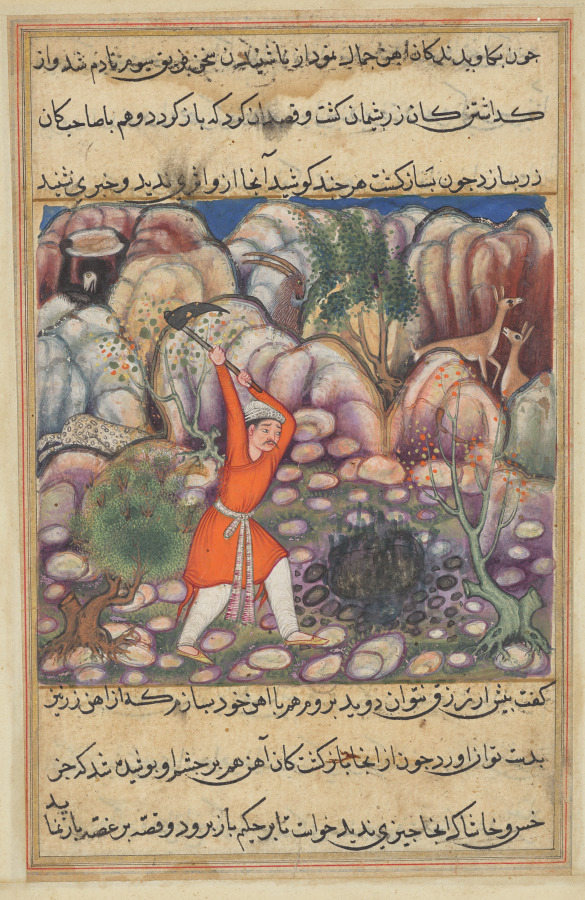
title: The fourth man digs at the spot where he dropped the shell, expecting jewels, but discovering mere iron, from a Tuti-nama (Tales of a Parrot): Forty-seventh Night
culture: Mughal India, court of Akbar (reigned 1556–1605)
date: c. 1560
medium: gum tempera, ink, and gold on paper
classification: Painting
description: Against a rocky landscape, a lone man raises a pickaxe. Previously, he and his four friends had received shells from a wise man, who claimed they would lead the men to their fortunes. Three of the friends discovered copper, silver, and gold. The fourth man, however, was dissatisfied with the discovery of iron, and his greed ultimately led to his downfall.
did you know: A bear, hiding among the rocks on the left, prepares to drop a stone on a spotted creature below him.